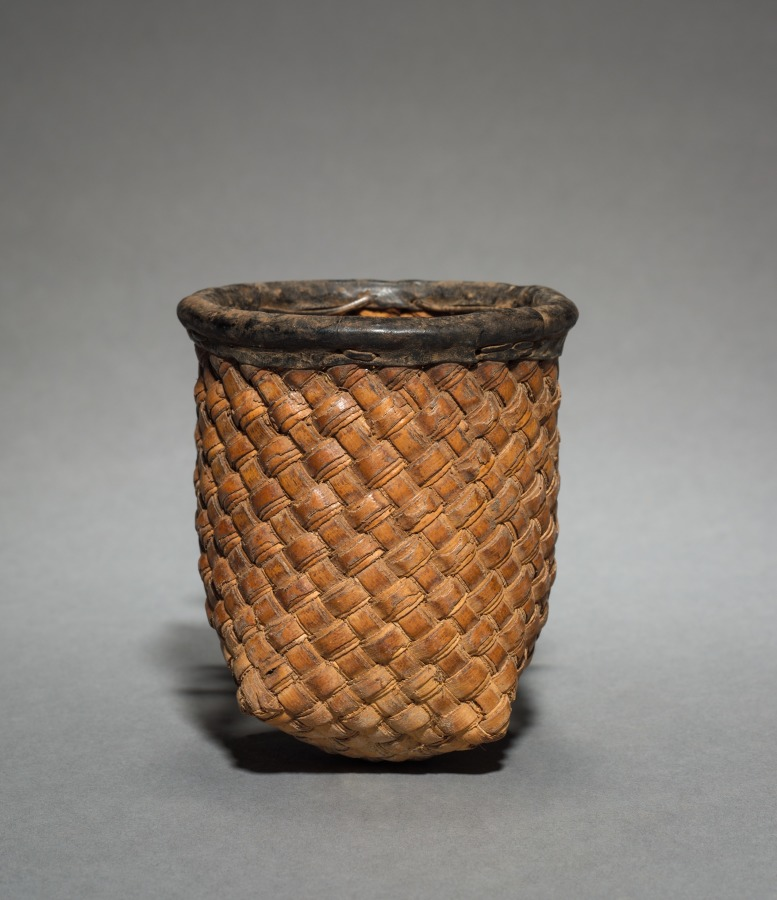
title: One of Ten Nesting Wedding Baskets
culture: Africa, Western Sudan, Burkina Faso, Lobi, 20th century (?)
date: c 1900s ?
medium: Plant fiber and leather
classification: Vessels